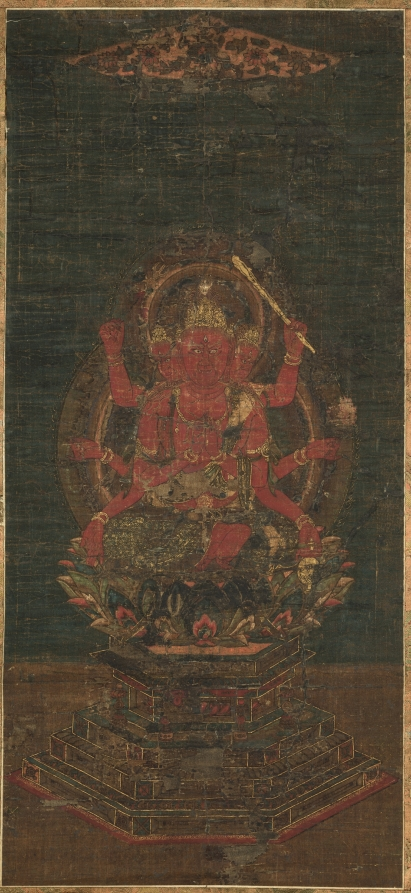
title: Wisdom King of Passion (Aizen Myōō)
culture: Japan, Muromachi period (1392–1573)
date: 1500s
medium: hanging scroll; color on silk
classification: Painting